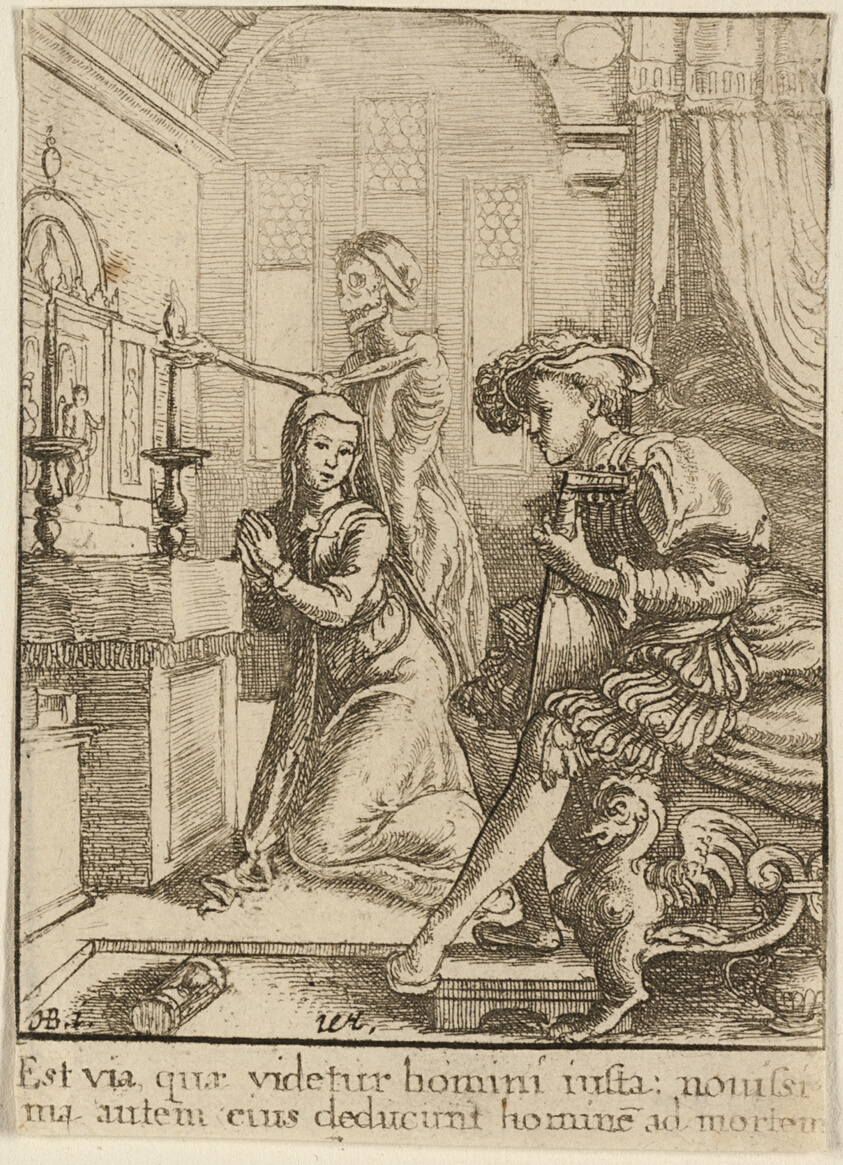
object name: Print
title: The Nun and Death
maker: Wenceslaus Hollar (Bohemian, 1607-1677); after Hans Holbein the younger (German, c.1497-1543)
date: 1651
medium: Etching on ivory wove paper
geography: Bohemia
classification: etching; print; prints and drawing